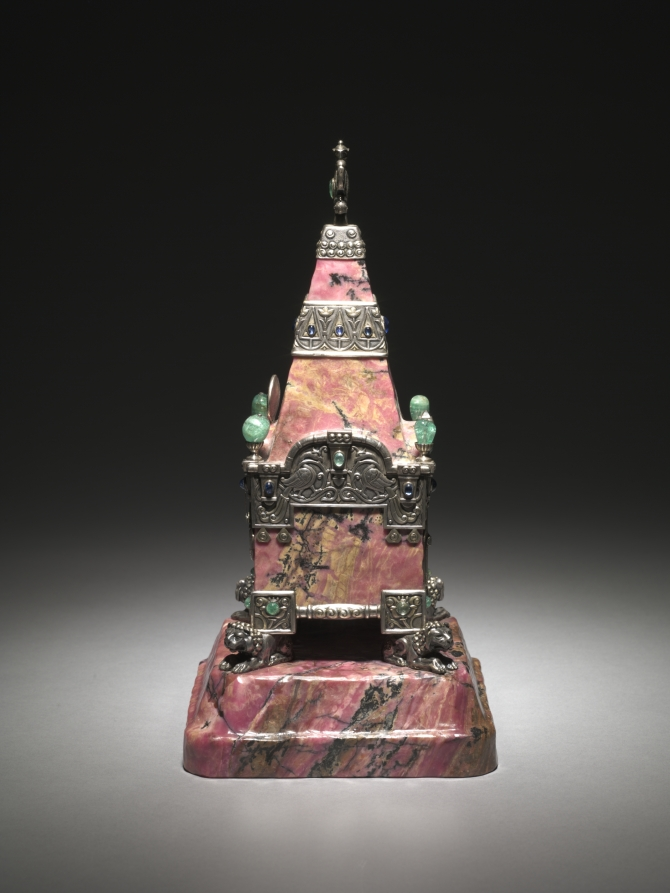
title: Kremlin Tower Clock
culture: Russia, St. Petersburg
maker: House of Fabergé (Russian, 1842–1918)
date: c. 1913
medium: rhodonite, silver, enamel, emeralds, sapphires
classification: Timepiece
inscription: 84, Kokoshnik, delta [assay mark for Moscow, 1908-26]; 91, Kokoshnik; 91; Kokoshnik; C. Fabergé (in Cyrillic); double-headed eagle [imperial warrant]; 16419 k? scratched.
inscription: Painted on clock face: Le Gruet (in script); strike, silence, set hand work (in English).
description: The use of Russian hardstones in creating precious objects became a hallmark of design from the House of Fabergé. Easily carved, these minerals were sourced largely from the western region surrounding the Ural Mountains. Fabergé's workmasters used colorful stones such as agate, nephrite (jade), lapis lazuli, rock crystal, and rhodonite, seen here in this elaborate table or mantel clock, to create all manner of luxurious accessories. Bright pink rhodonite was among the rarest, and consequently most expensive, specimens used by the House of Fabergé. This clock resembles the Taynitskaya Tower, the middle tower on the south side of the Kremlin. The House of Fabergé created this work to commemorate the 300th anniversary of the Romanov dynasty, representing Fabergé's ability to balance the functionality of objects with intricate decorative design.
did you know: The Kremlin tower, which this clock resembles, has a secret well and an underground tunnel that leads to the Moscow River.